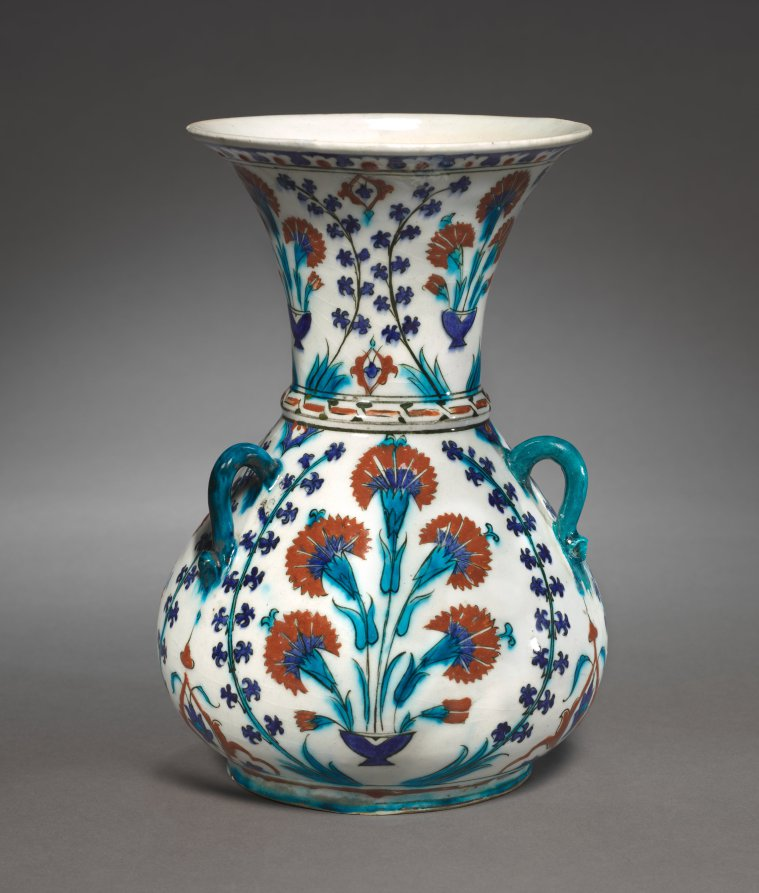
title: Mosque Lamp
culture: Turkey, Iznik, Ottoman period (1299–1922)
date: 1585–95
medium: Fritware with underglaze design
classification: Ceramic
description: Mosque lamps typically functioned as a lampshade, containing an oil lamp inside. Due to the opacity of this Ottoman lamp, it is likely that its primary function was not illumination. Instead, it would have been hung from chains in a mosque or mausoleum to add to the beauty of the space. This lamp is decorated with bright red carnations and blue hyacinths with additional floral and vegetal elements. The turquoise loops would have served for suspension from the ceiling. It is also possible that lamps like this were used as acoustic devices, softening the echo of prayer and discussion within the mosque’s halls.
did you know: Fritware is made of ground quartz, glass frit, and a small proportion of fine white clay to approximate the light color and weight of Chinese porcelain.